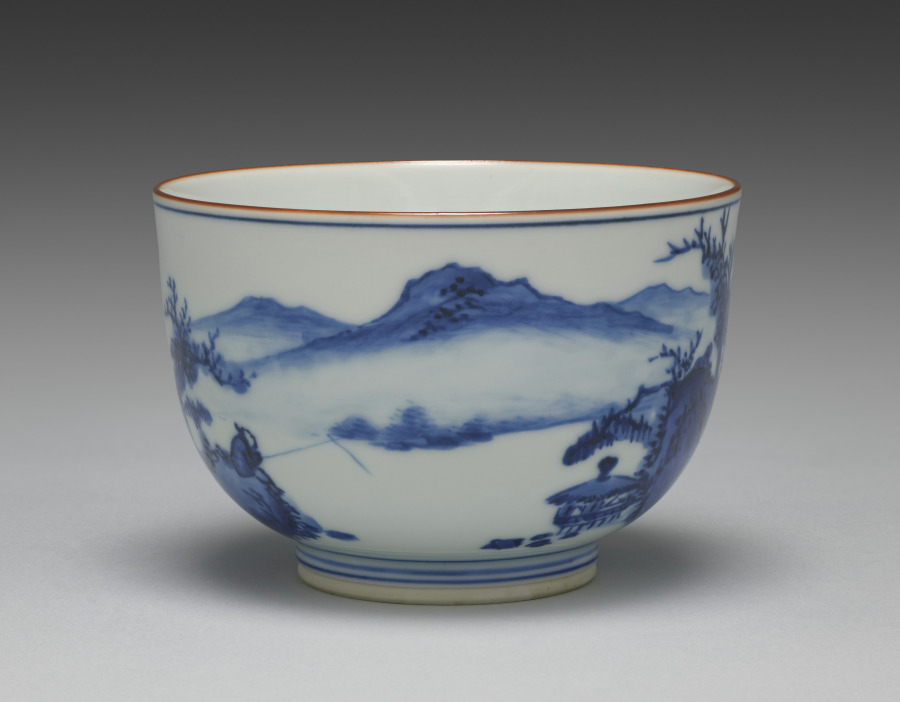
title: Bowl with Chinese Landscape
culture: Japan, Meiji period (1868–1912)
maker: Seifū Yohei III (Japanese, 1851–1914)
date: 1893–1914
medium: porcelain with underglaze blue and overglaze red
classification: Ceramic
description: This bowl has a landscape with figures in blue and iron oxide. The scene is set along a river with mountains in the distance, likely in the Jiangnan region of southern China, famous for compositions of the Eight Views of the Xiao and Xiang Rivers and of West Lake in Hangzhou. There are two people in the foreground: one person fishes along the riverbank across from a rustic hermit’s lodge sited on stilts over the water’s edge; on the other side of the bowl, a person with a tall staff gazes at the full moon, accompanied by his servant. The foot has a double band in blue, while another blue band encircles the bowl just beneath the rim, which is covered in red iron oxide. The inside of the footring is also circled in blue around the impressed mark.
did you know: The flock of geese making its way across the sky and the many bare tree branches suggest the season may be autumn.